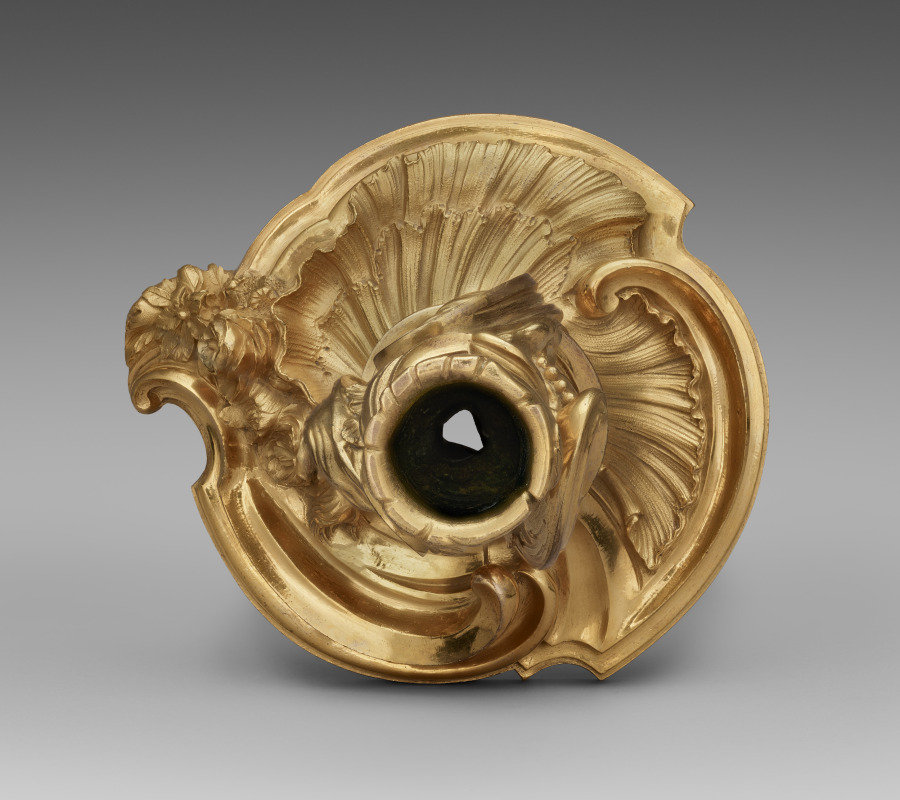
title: Candlestick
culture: France, 18th century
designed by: Juste-Aurèle Meissonnier (French, 1695–1750)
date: c. 1740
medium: gilt metal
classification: Furniture and woodwork